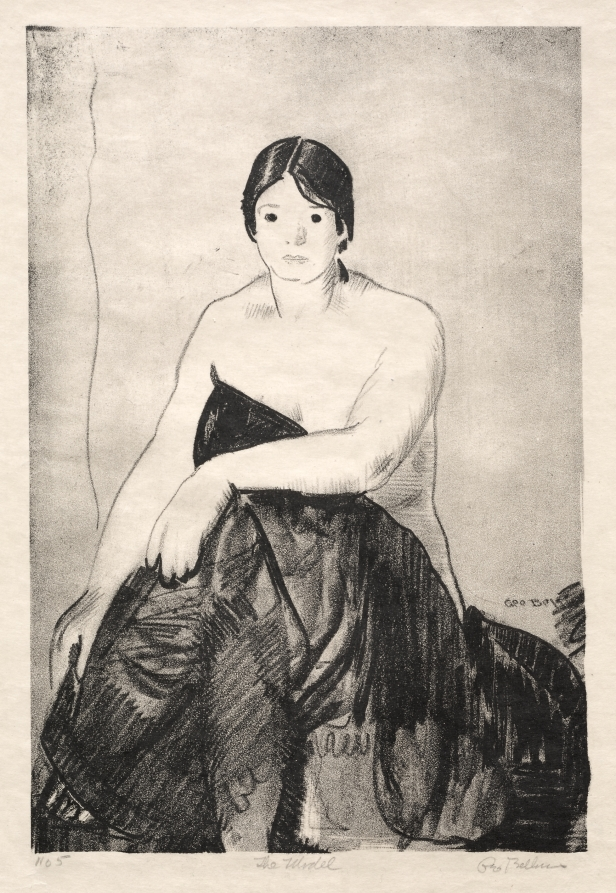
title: The Model, First Stone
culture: America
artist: George Bellows (American, 1882–1925)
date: 1917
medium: lithograph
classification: Print